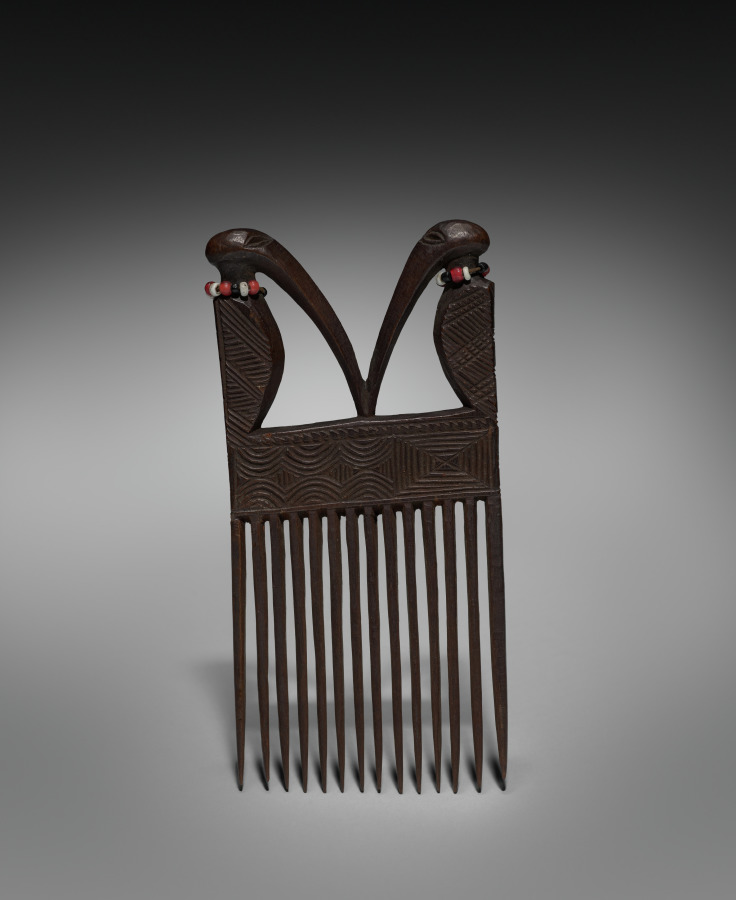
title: Comb (cisakulo)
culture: Africa, Central Africa, Angola, or Democratic Republic of Congo, Chokwe-style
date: mid- to late 1800s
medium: Wood, glass beads, and natural fibers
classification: Jewelry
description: Chokwe women and men inserted finely decorated combs and pins in their hair to signal rank and wealth. Here, as among neighboring peoples, hairstyles reflected changing trends across place and over time. This comb's wooden material and sculptural top made it of a higher value than simple examples made from metal or cane. Its wide teeth were practical, securing elements of a hairstyle in place. The long-beaked ngungu birds with beaded necklaces were a well-known symbol of chiefly power. In addition to being a sign of beauty and good health, a well-styled hairdo also suggests that the wearer relies on the help of others in its creation. Combs were often gifted to women by admirers or husbands to mark important life events. This comb entered the Cleveland Museum of Art's collection in 1915, one year before the museum opened its doors.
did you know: The double birds on this comb are the ngungu, a kind of hornbill linked to hunting and the related power of leaders. They were considered a good omen, and served as mediators between the earthly world and the spiritual one.